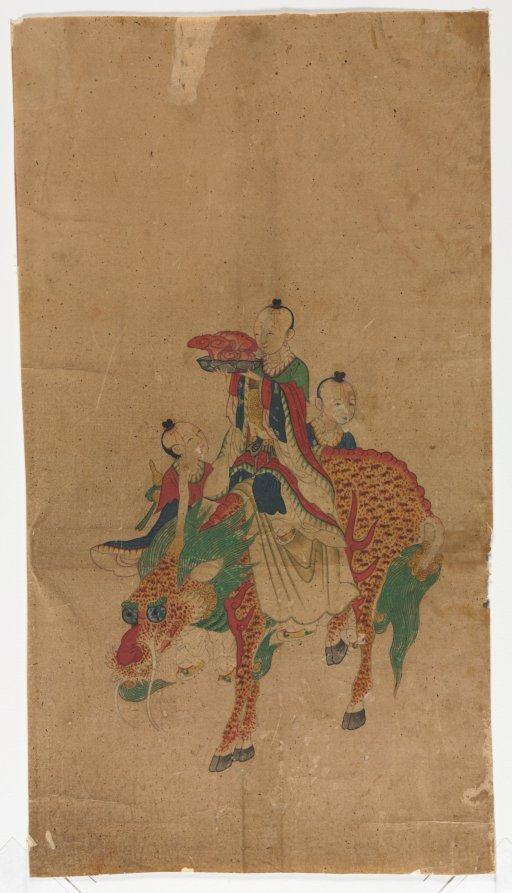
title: Daoist Immortal on a Qilin and Two Attendants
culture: Korea, Joseon dynasty (1392–1910)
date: late 1800s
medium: Ink and color on paper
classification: Painting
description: By the late 18th century, subjects that deal with Daoist immortals and their fantasy stories were increasingly chosen for paintings. For their wish-granting message, Daoist figure paintings such as this one were often commissioned to celebrate festive occasions. Judging from its dimension, this paining used to be part of either a small-size multi-panel folding screen or a large-size album that depicts a series of Daoist immortals and Buddhist deities.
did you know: As a fantastical animal hybrid of a griffin and a sphinx, the animal qilin was used as a symbol of heavenly blessings.